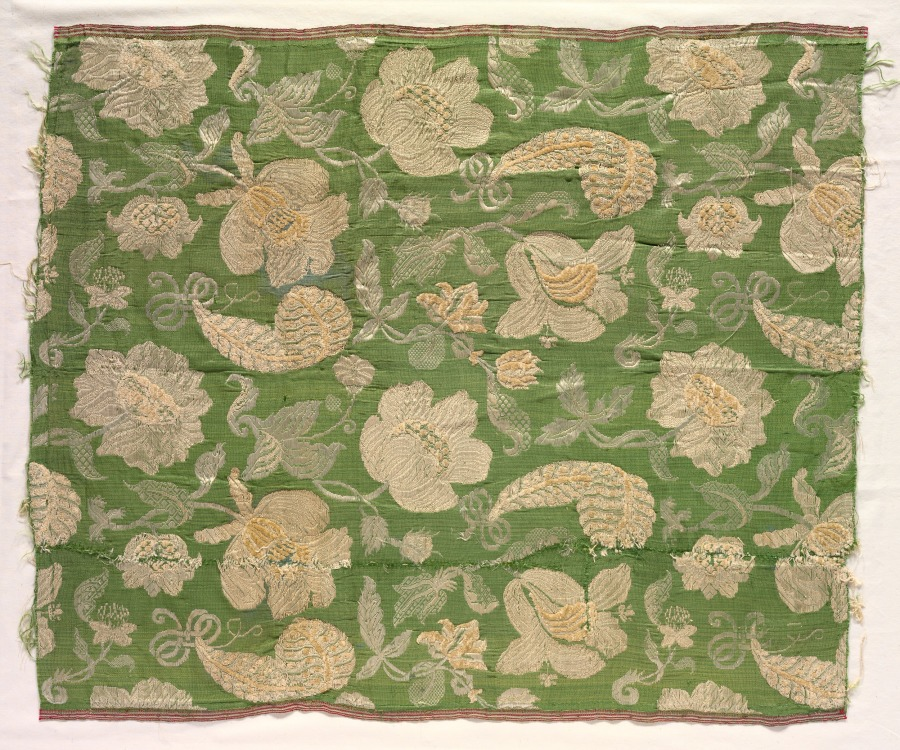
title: Fragments of Silk Textile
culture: Spain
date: 1700s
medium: plain cloth, brocaded; silk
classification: Textile